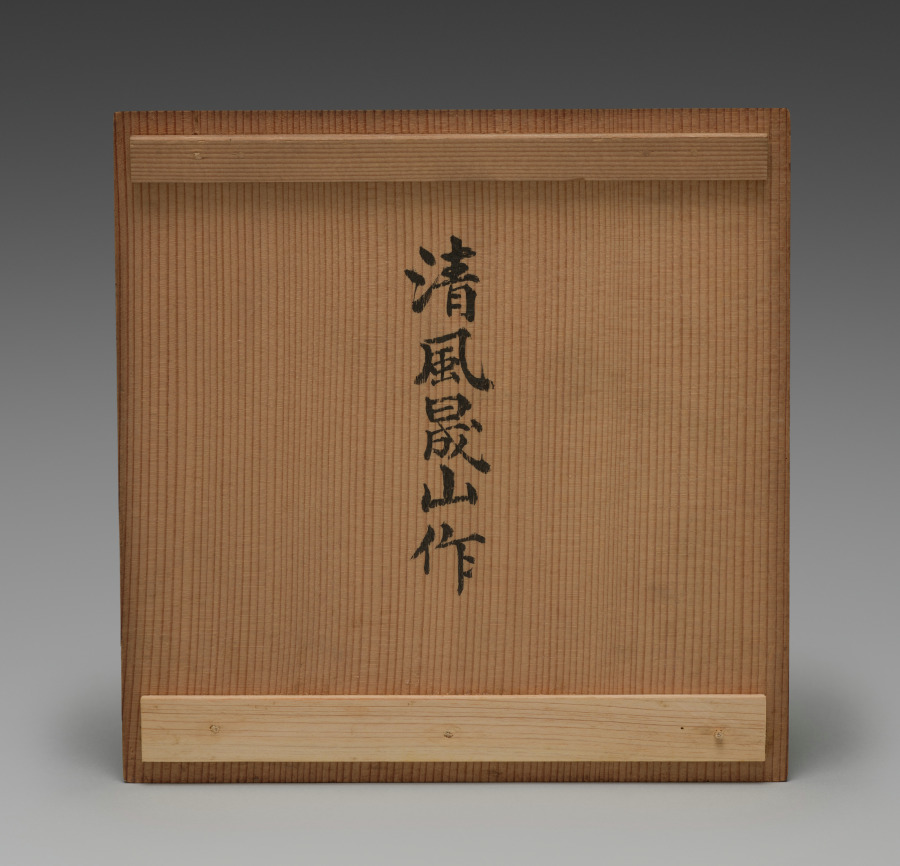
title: Water Container with Peonies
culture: Japan, Meiji period (1868–1912)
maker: Seifū Yohei III (Japanese, 1851–1914)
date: 1900–1914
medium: Porcelain with molded and carved design, green glaze, and black lacquered lid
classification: Ceramic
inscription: 清風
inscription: 帝室技芸員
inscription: 清風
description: This ceramic is an especially accomplished example of Yohei III’s combination of an allover translucent colored glaze with molded and carved designs. It features the peony as its primary motif. The water container, or mizusashi, has a green glaze, and its design takes into consideration the rounded shape and the seated position of the host and guests. It begins low on the body with a flower just beginning to open and continues with another flower a bit higher up, with its petals fully extended and beginning to open outward. It finishes with a flower in full bloom, petals and leaves unfurled and spread outward from the center, now occupying almost the entire surface. The water container once belonged to the Hosokawa family, whose go-between corresponded with Yohei IV about the piece. Yohei IV thanked them for their payment and requested that despite his father’s death in the previous year, they continue to favor the studio with their orders. The letter and its envelope, as well as an auction tag, remain with the object.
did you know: This water container may also serve as a site for cultural reckoning, as when the life cycle of a flower prized in East Asia as a symbol of wealth is displayed across a Japanese chanoyu vessel whose glaze is associated with the seats of power in China and Korea.